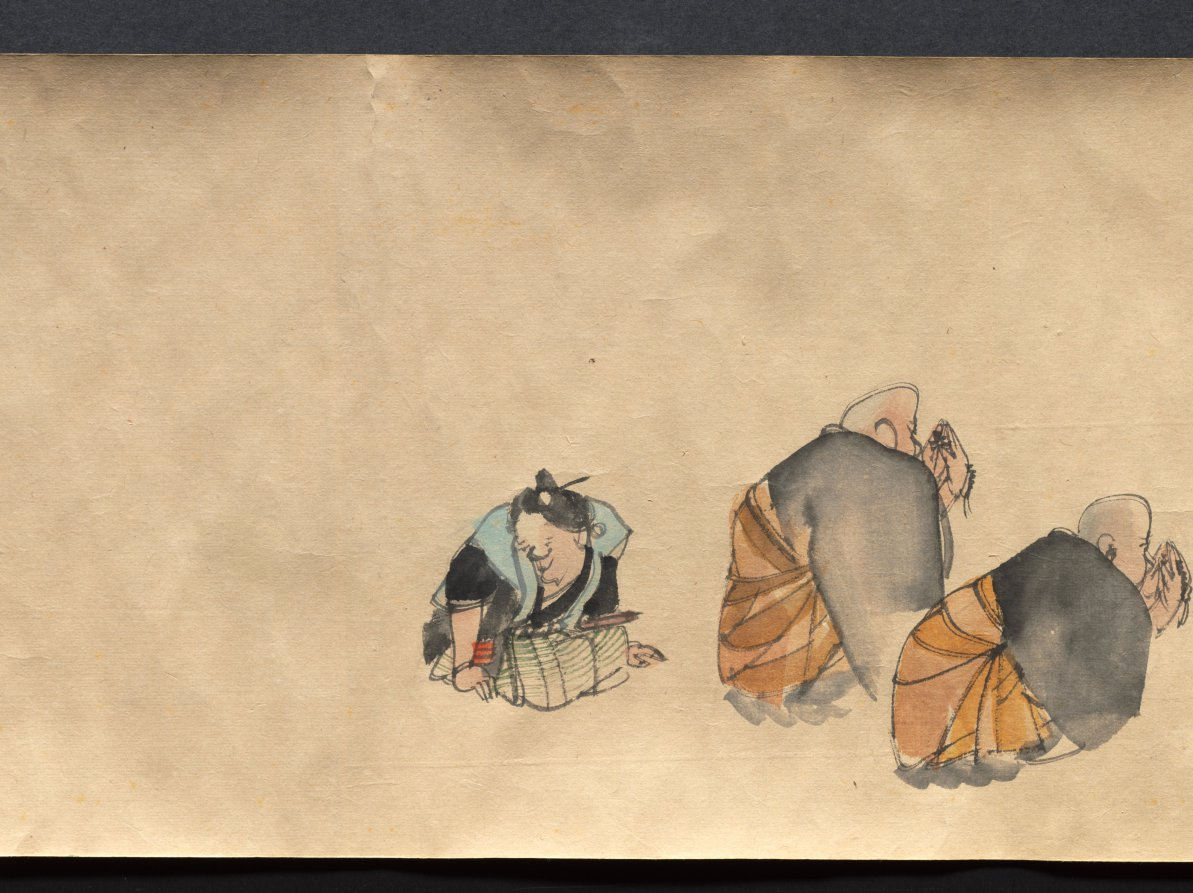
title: Festival Scenes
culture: Japan, Edo period (1615–1868)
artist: Suzuki Nanrei (Japanese, 1775–1844)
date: c. 1795–1844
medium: handscroll; ink and color on paper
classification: Painting